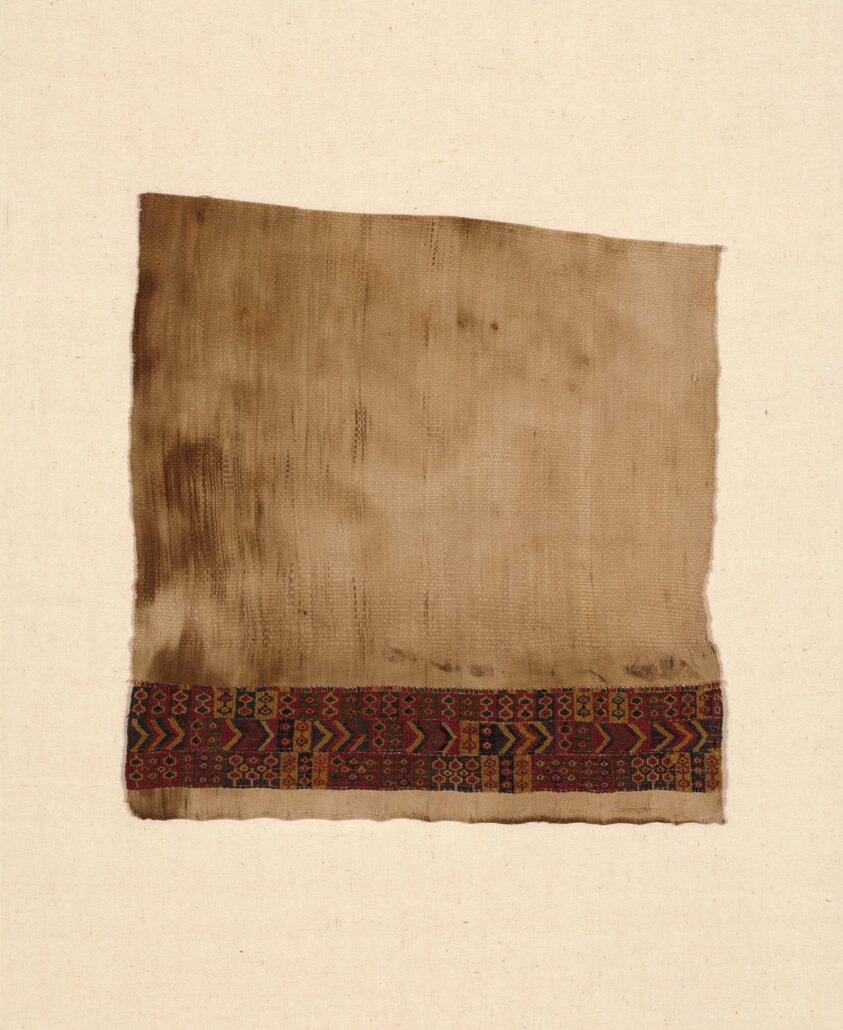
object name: Textile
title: Fragment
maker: Probably central coast, Peru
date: A.D. 1000/1476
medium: Cotton, plain weave with band of cotton and wool (camelid), slit and single interlocking tapestry weave with supplementary weft slit closure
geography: Peru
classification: textile; weaving